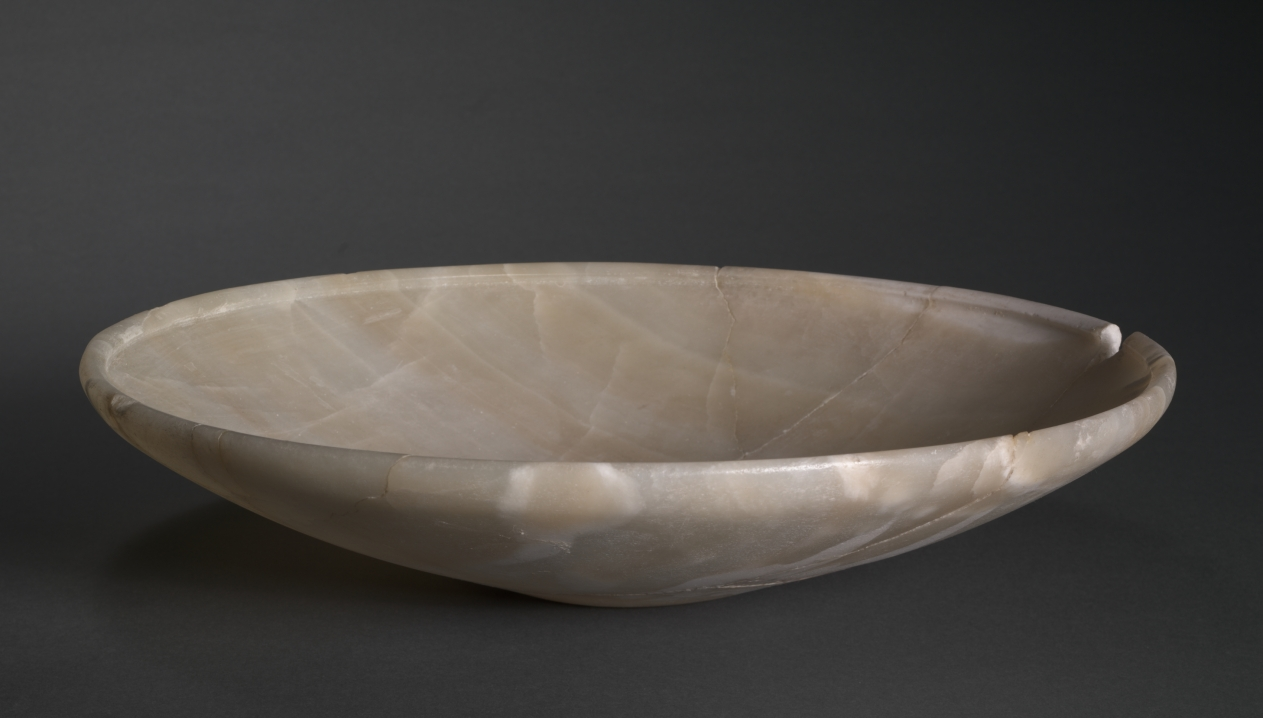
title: Shallow Dish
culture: Egypt, Saqqara, Early Dynastic (2950–2647 BCE), Dynasty 2, reign of Nynetjer (c. 2700 BCE) or later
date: c. 2726–2647 BCE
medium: travertine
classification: Vessels